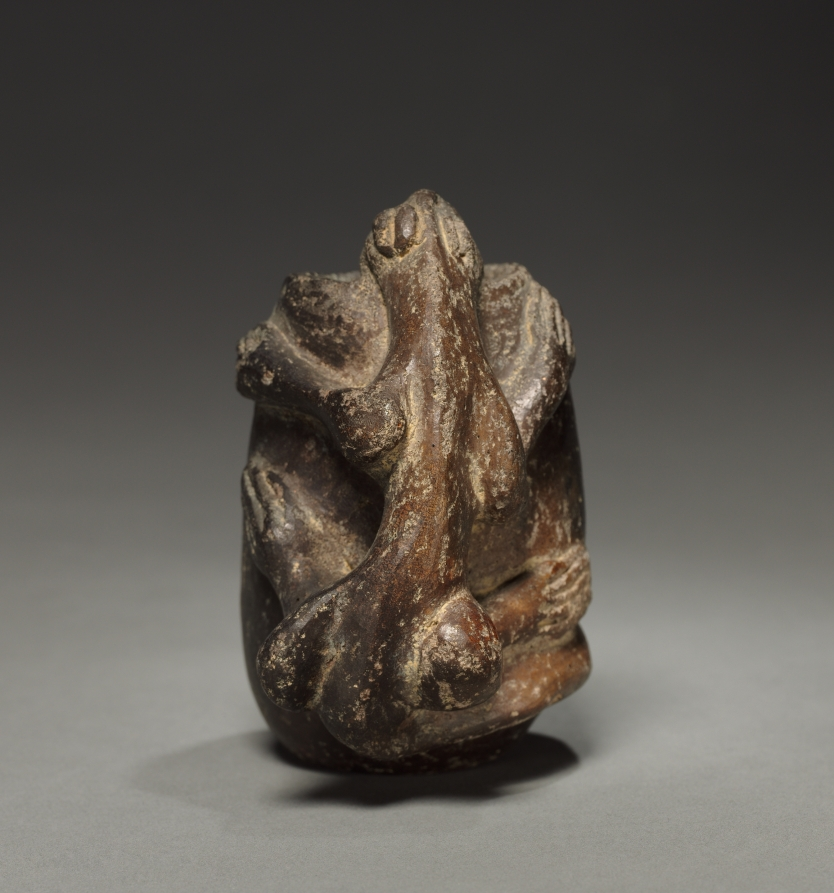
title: Jar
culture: Colombia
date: before 1921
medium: pottery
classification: Ceramic